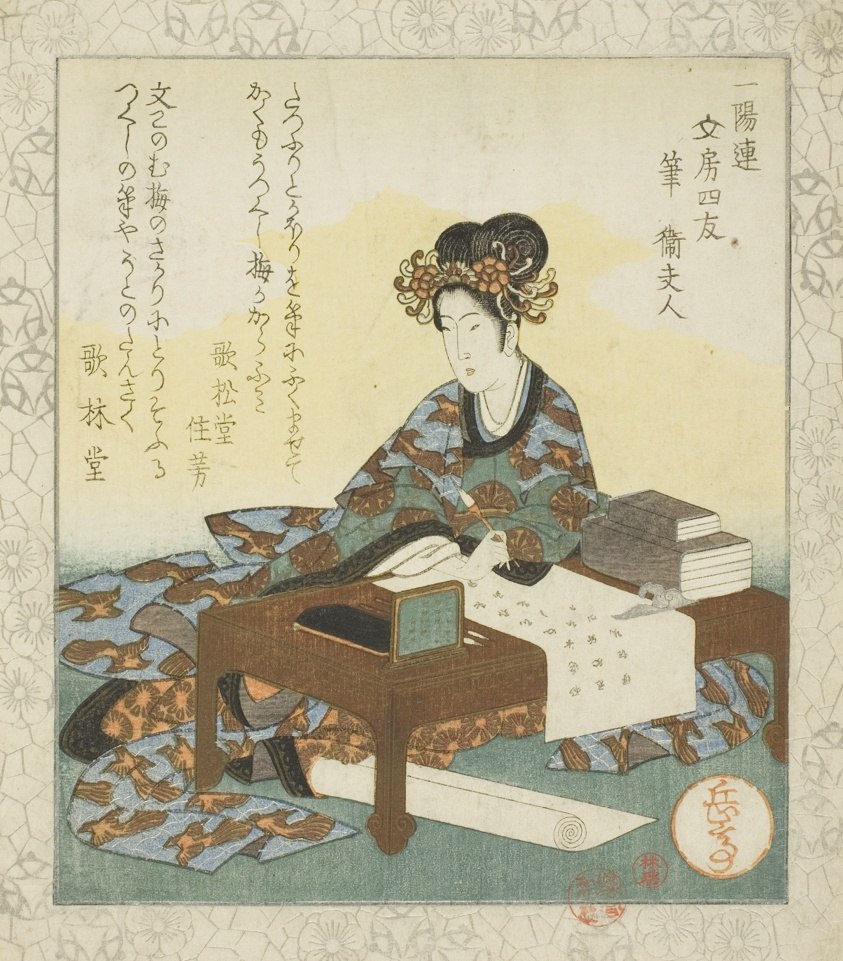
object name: Print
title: Brush: Lady Wei (Fude: Ei fujin), from the series "The Four Friends of the Writing Table for the Ichiyo Circle (Ichiyoren bunbo shiyu)"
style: Japanese (culture or style)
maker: Yashima Gakutei (Japanese, 1786 (?)-1868)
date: c. 1827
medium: Color woodblock print; shikishiban, surimono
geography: Japan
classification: woodblock print; print; asian art